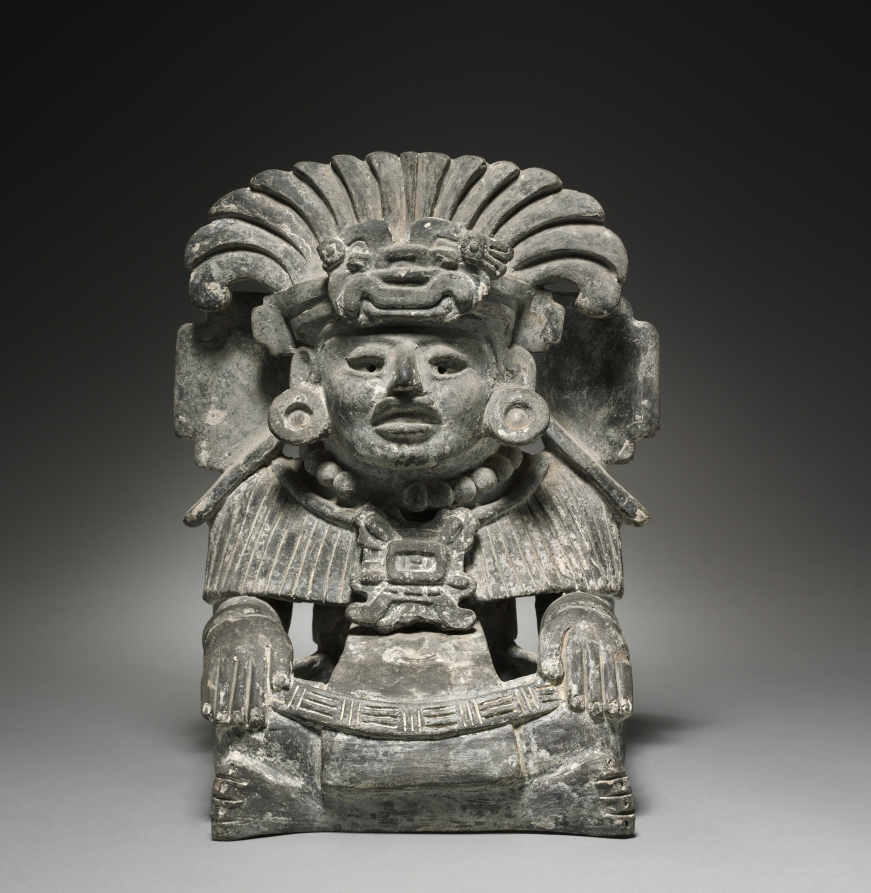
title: Effigy Urn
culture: Mexico, Zapotec, Monte Albán IIIB style, 20th century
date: 1900s (Thermoluminescence date, after 1930)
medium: gray pottery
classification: Sculpture